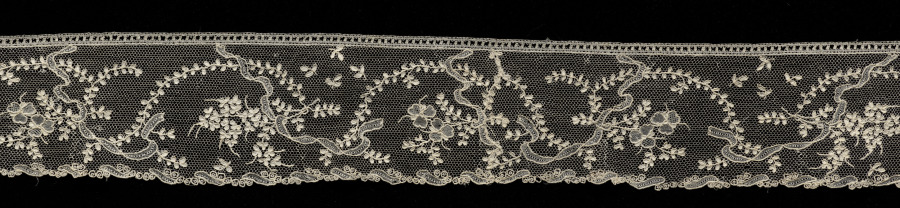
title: Lace Edging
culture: France, Alençon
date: 1740–60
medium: Needle lace (Point d'Alençon)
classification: Lace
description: With its flowing ribbon and garland pattern, this lace edging is from the late Louis 15th period or early Louis 16th period.